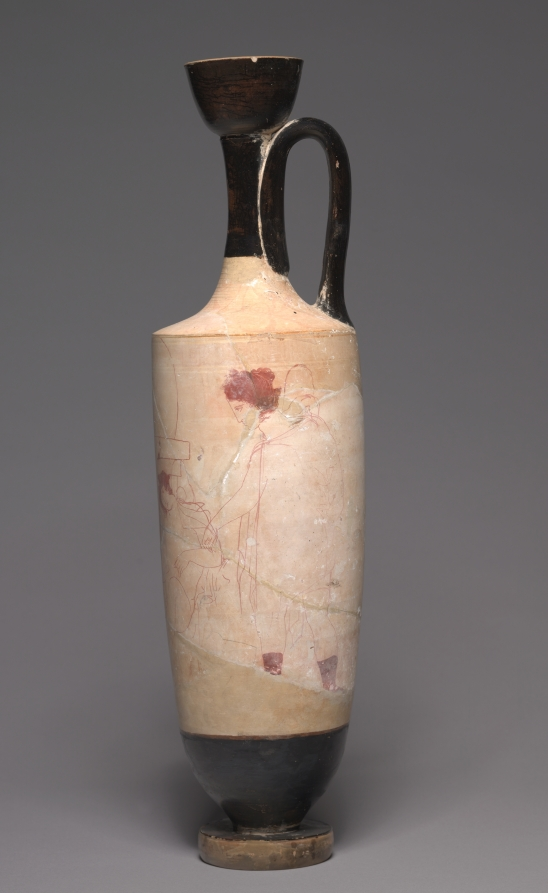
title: White-Ground Lekythos (Oil Vessel): Youths at Tomb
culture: Greek, Attic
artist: attributed to Group R (Greek, Attic, active c. 420–410 BCE)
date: c. 420–400 BCE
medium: ceramic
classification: Ceramic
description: This white-ground lekythos, a large funerary oil vessel, shows three youths at a tomb. The one seated in the center likely represents the deceased, while those standing on either side are mourners. Although much of the pigment is now lost, the strong use of line and three-quarter views have been cited by some scholars as possibly reflecting the lost works of the famous wall-painter Parrhasios.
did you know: White-ground vases give some idea of the appearance of ancient wall painting.